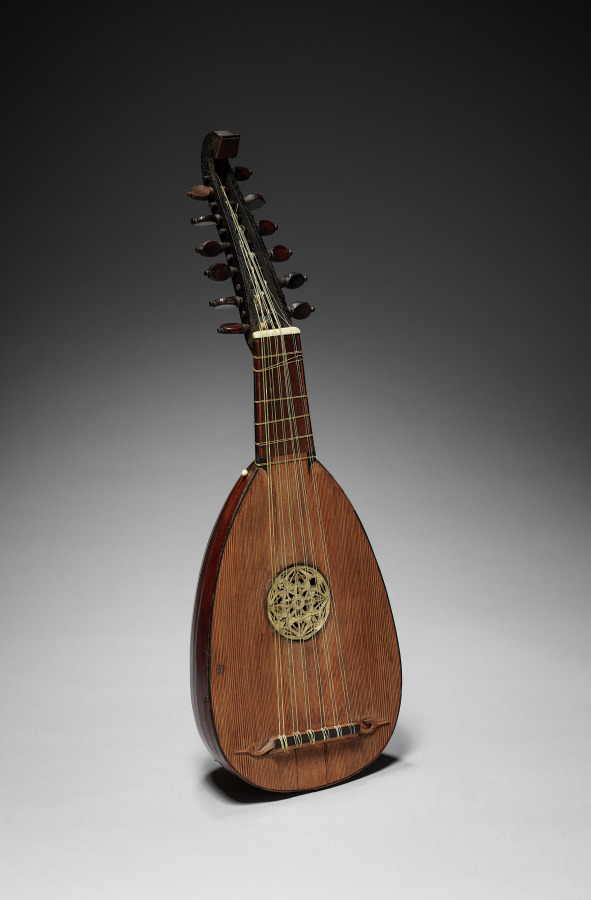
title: Lutina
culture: Italy, Milan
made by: Francesco Presbier (Italian)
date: 1736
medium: wood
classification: Musical Instrument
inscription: bears label: "Francesco Presbier in Milano nella/ contrada della Dogana fegno/ del Sole 1736."